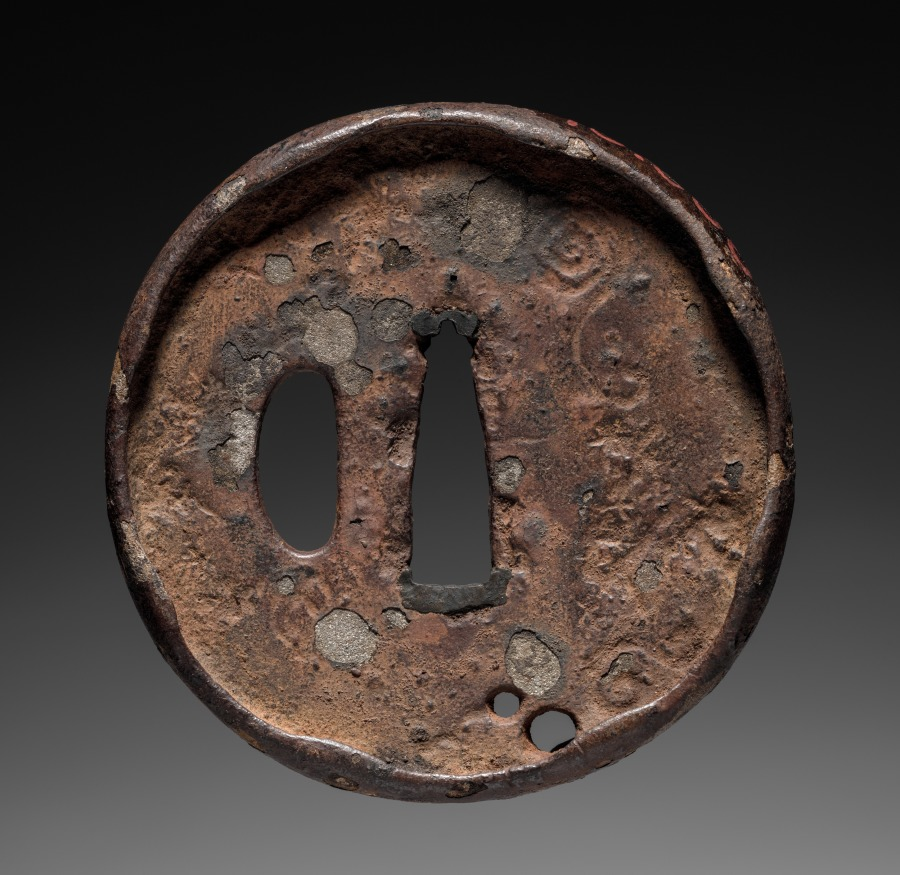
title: Sword Guard (Tsuba)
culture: Japan, possibly Edo period (1615-1868)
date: c. 1615–1868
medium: iron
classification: Arms and Armor